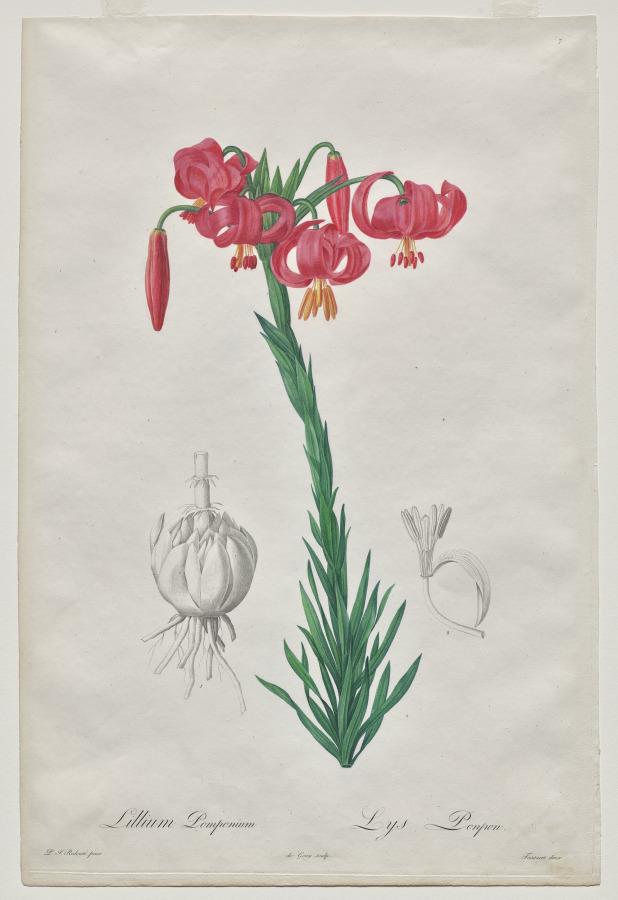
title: Lillium Pomponium (Turban Lily), plate 7 from Les Liliacées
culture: France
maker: De Gouy (French, 1670–1830)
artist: after Pierre-Joseph Redouté (French, 1759–1840)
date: 1802–16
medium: stipple engraving with hand coloring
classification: Print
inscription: Watermark: A. CORTALIN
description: The Belgian Pierre-Joseph Redouté became the most celebrated botanical illustrator of his day, serving as court painter in France to Marie Antoinette and later, the Empress Josephina. Called the “Raphaël des fleurs” (Raphael of flowers), he published two lavish collections of his botanical illustrations that were reproduced as stipple engravings, printed in color, and finished with painting by hand. This is one plate from the eight-volume Les Liliacées (1802–1816), which is devoted to the lily family—plants that grow from bulbs, corms, or tubers.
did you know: The artist's great-grandfather, grandfather, father, and two brothers all earned their living as artists.